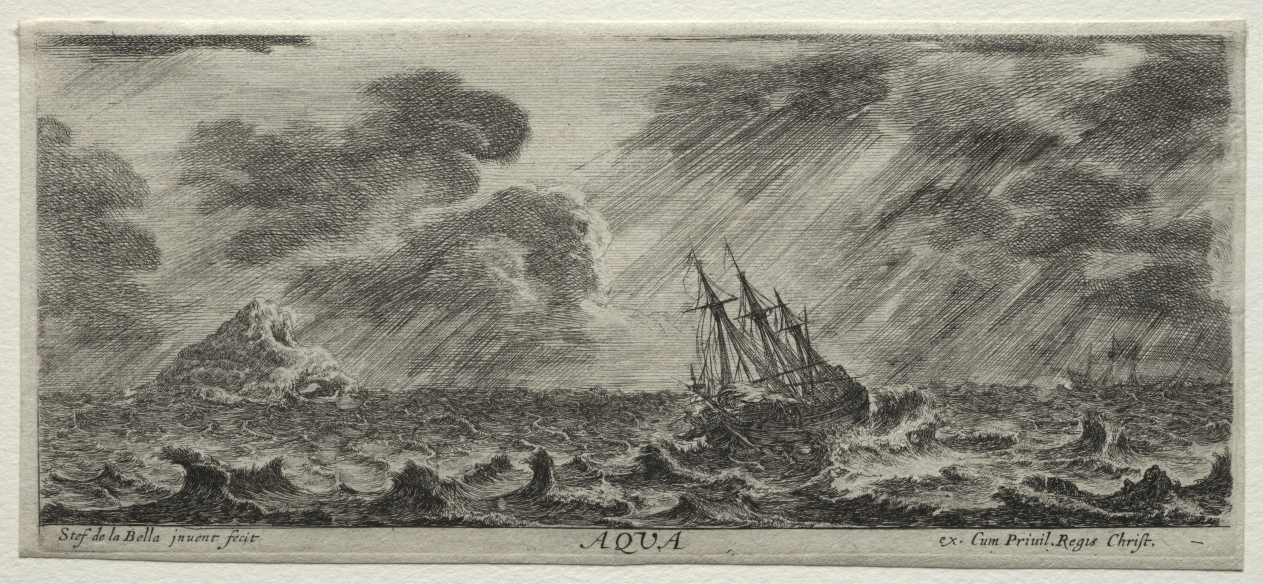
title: The Four Elements: Aqua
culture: Italy, 17th century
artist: Stefano Della Bella (Italian, 1610–1664)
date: c. 1648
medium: etching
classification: Print